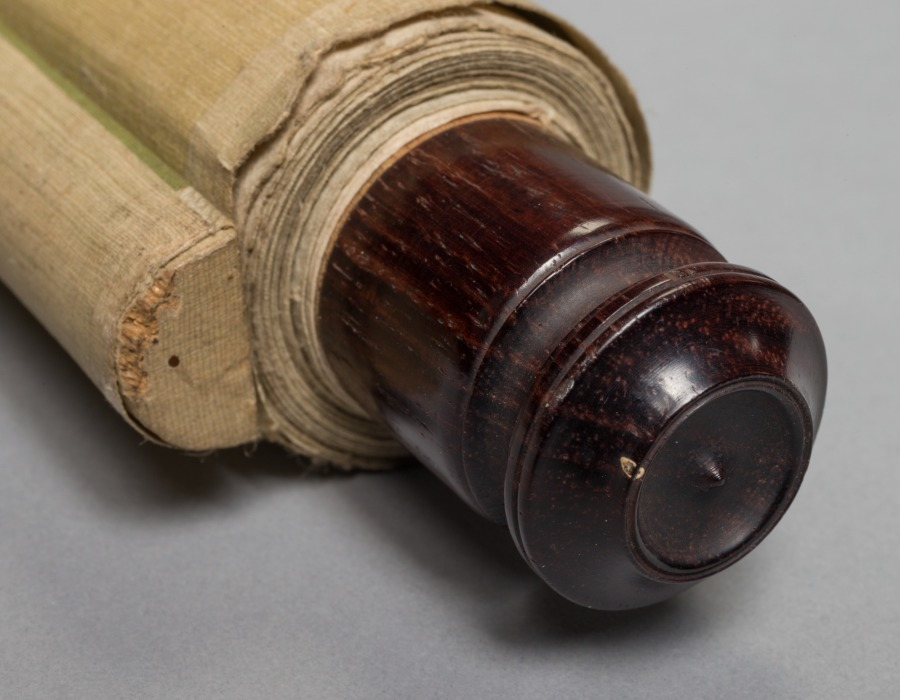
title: Landscape with Figures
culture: Japan, Edo period (1615–1868)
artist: Fujimoto Tesseki (Japanese, 1816–1863)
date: c. 1840–63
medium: hanging scroll; ink and color on paper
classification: Painting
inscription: Artist's inscription and two seals in upper right. A third seal in lower left.